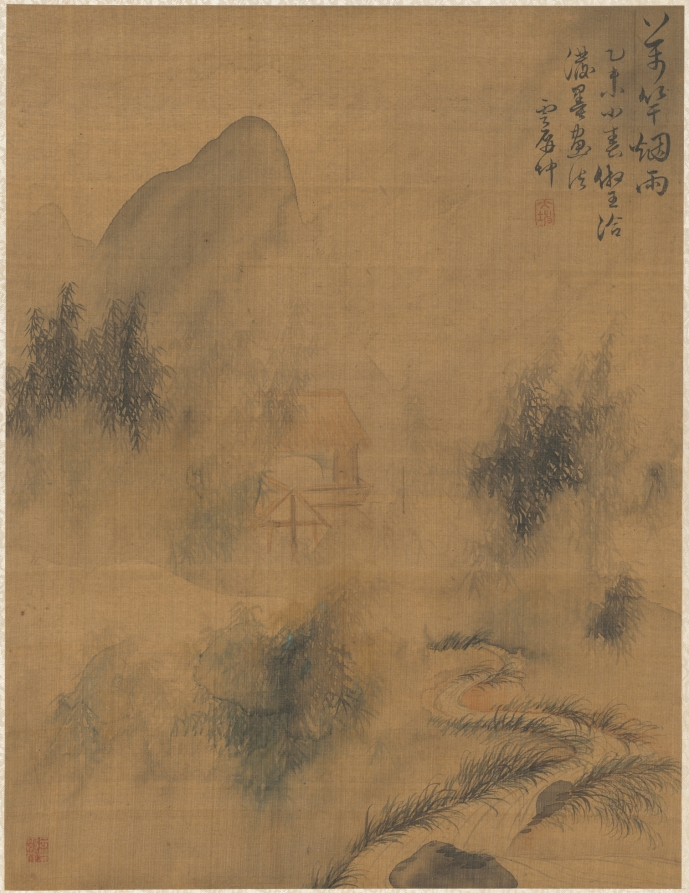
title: Ten Thousand Bamboos in the Mist and Rain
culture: China, Qing dynasty (1644-1911)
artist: Zhai Dakun (Chinese, d. 1804)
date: 1775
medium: album leaf; ink and color on silk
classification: Painting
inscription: Ten Thousand Bamboos in the Mist and Rain. In the tenth lunar month of the year yiwei (1775), in the ink-painting manner of Wang ___________. Yunping Kun Seal: r/r "Dakun"